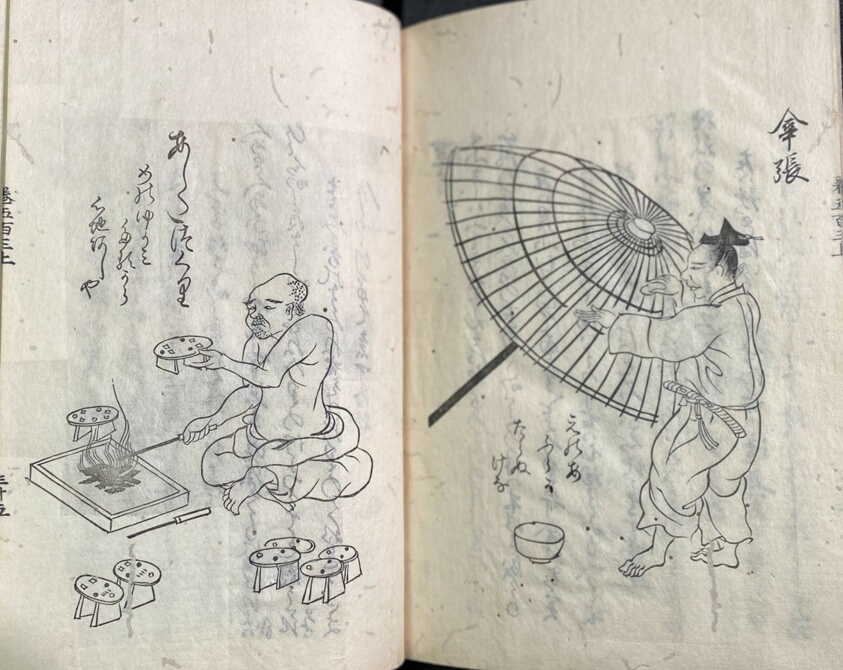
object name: Book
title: Gunsho Ruiju (Literature collection)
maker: Artist unknown (Japanese)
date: c. 19th/20th century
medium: Woodblock-printed book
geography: Japan